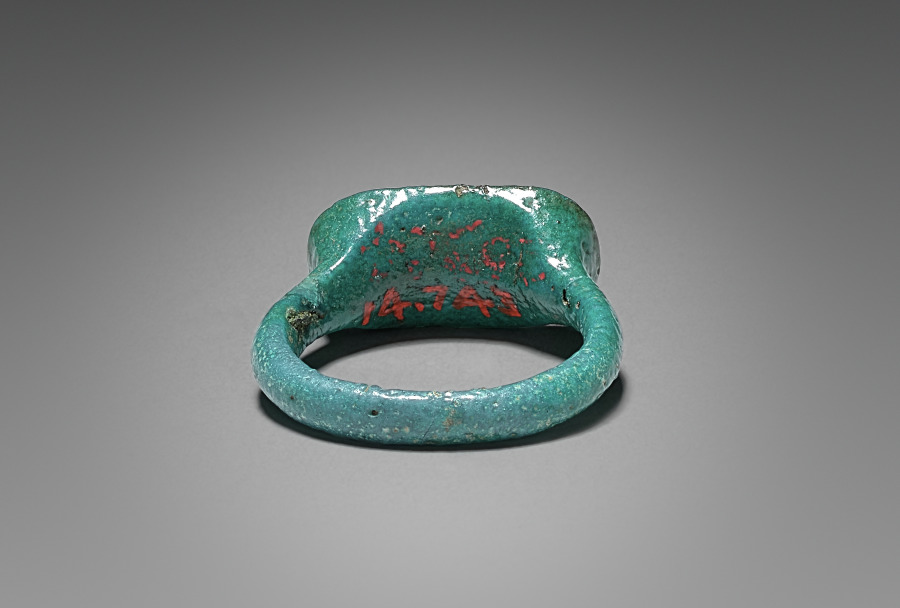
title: New Year's Ring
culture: Egypt, Late period (715–332 BCE), Dynasty 26 or later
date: 664–525 BCE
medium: dark turquoise green faience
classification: Jewelry